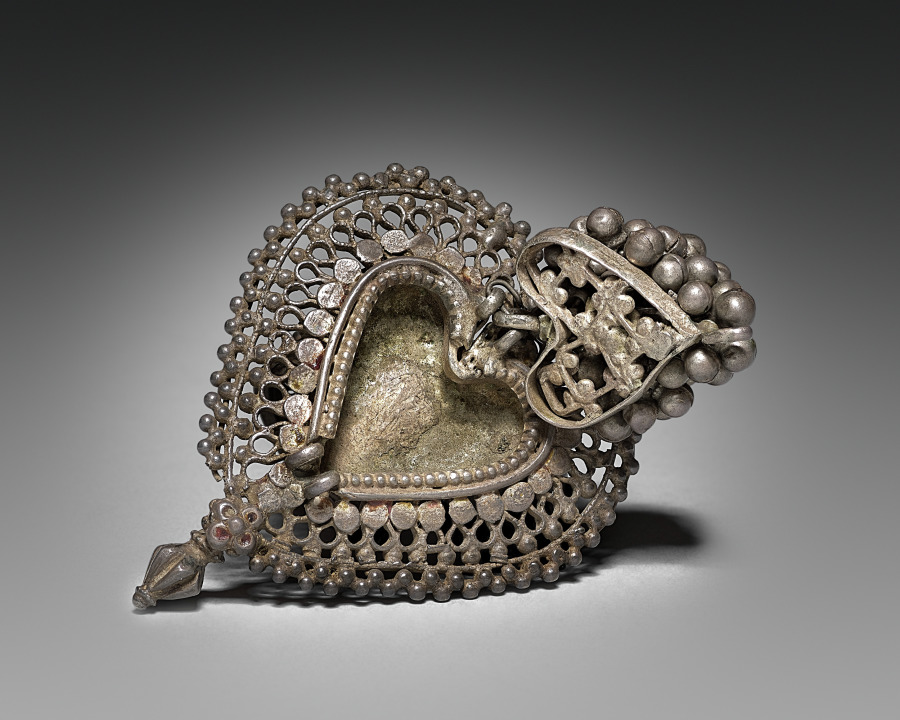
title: Ring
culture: India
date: 1800s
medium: silver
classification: Jewelry